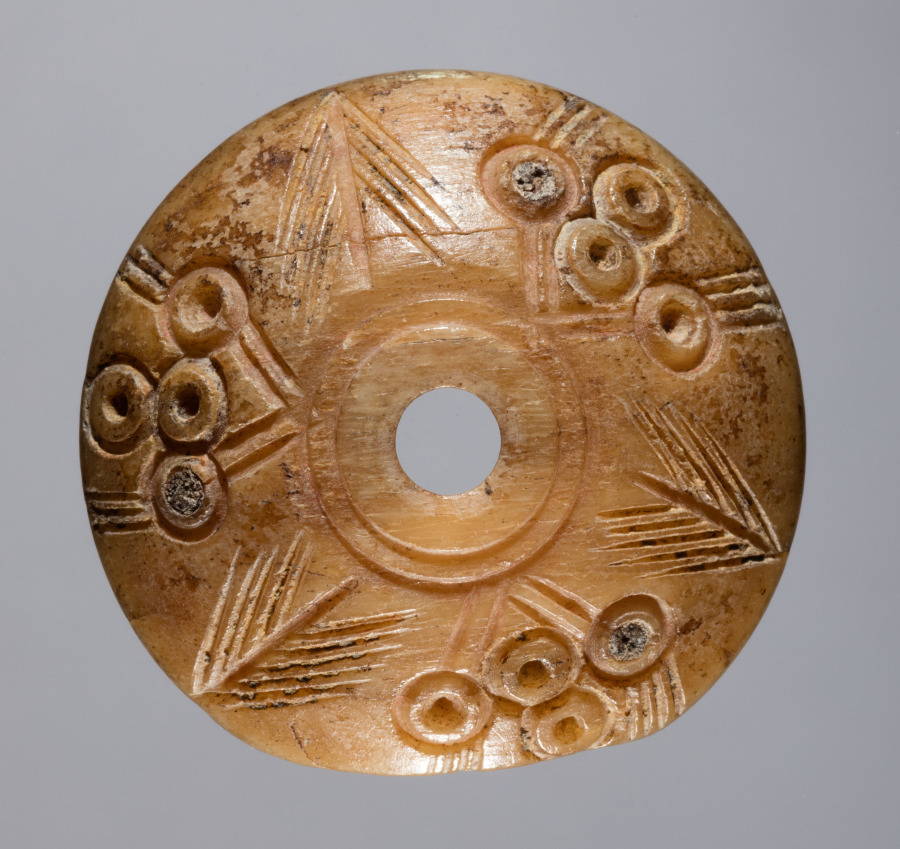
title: Spindle Whorl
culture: Iran, early Islamic period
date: 700s - 900s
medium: bone, incised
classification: Spindle Whorl